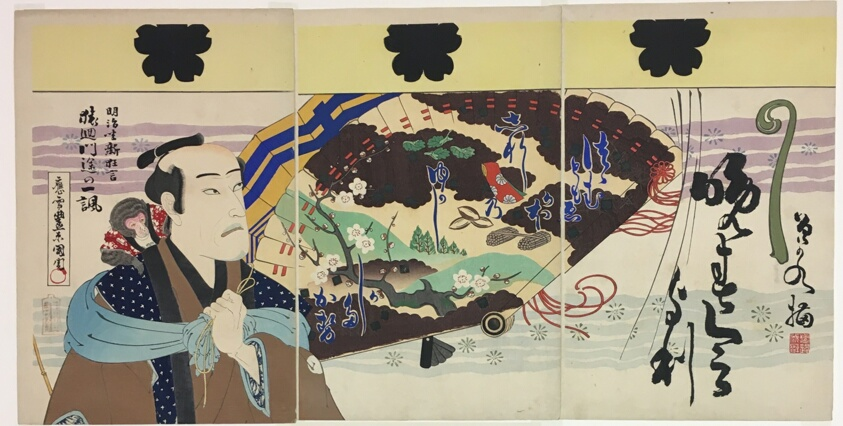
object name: Print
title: Actor Onoe Kikugoro V as Yojiro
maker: Toyohara Kunichika (Japanese, 1835-1900)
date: 1896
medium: Color woodblock print; oban triptych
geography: Japan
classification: woodblock print; print; asian art